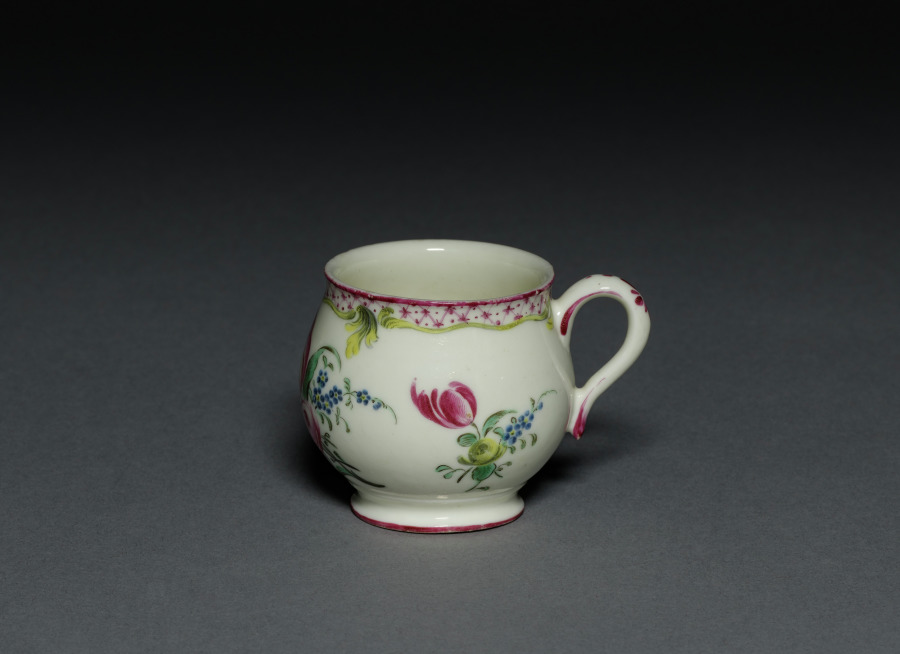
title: Custard Cup (pot à jus)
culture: France, Mennecy, 18th century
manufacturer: Mennecy- Villeroy Factory (French)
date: c. 1750–55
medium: soft-paste porcelain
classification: Ceramic